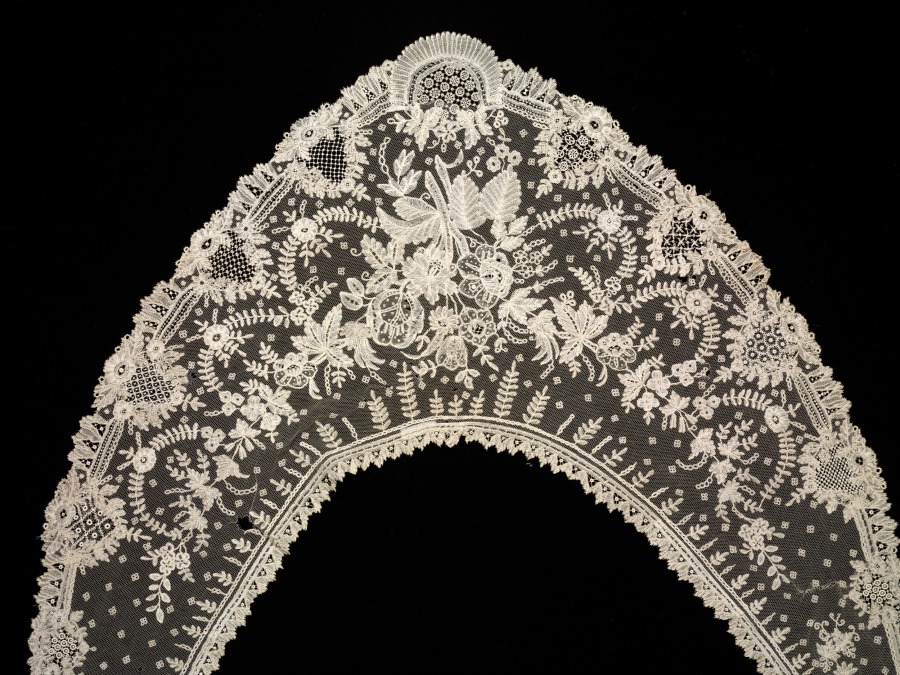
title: Fichu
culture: France or Belgium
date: c. 1875–80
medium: Composite lace. Machine-made netting (reseau), Brussels bobbin lace and French needle point lace; linen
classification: Lace